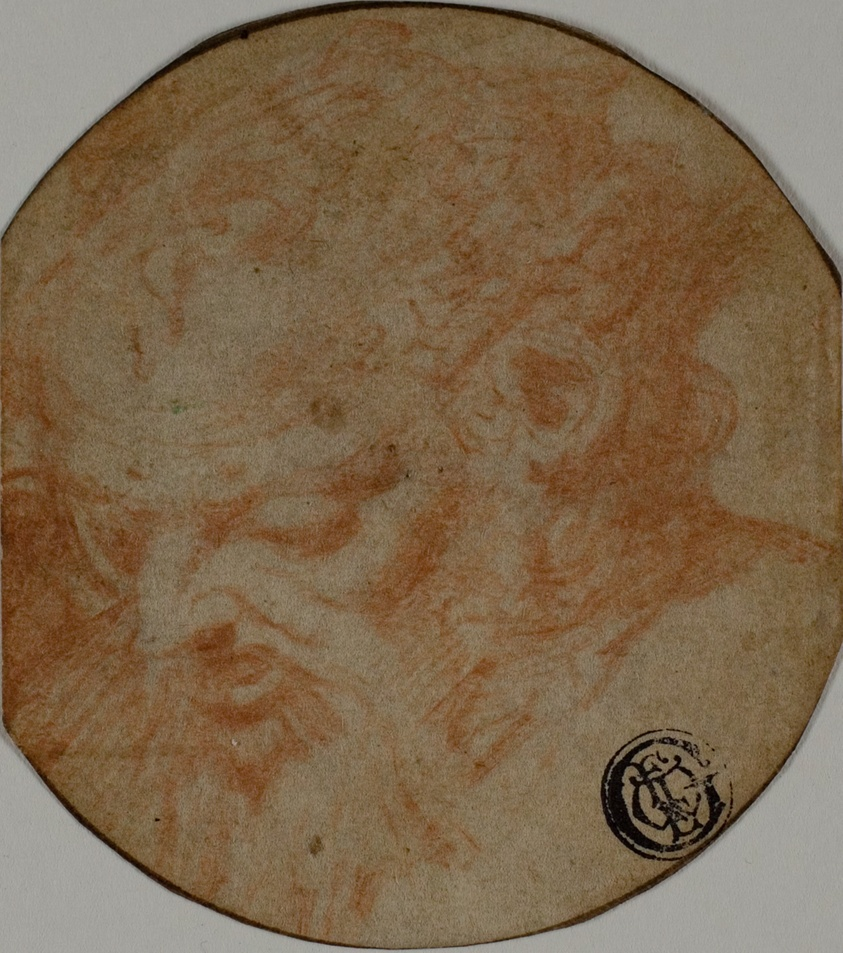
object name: Drawing and Watercolor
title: After the Antique (?): Head of a Satyr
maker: Unknown Artist; Italian, 1500-1599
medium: Red chalk on ivory laid paper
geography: Italy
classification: chalk; drawings (visual works); prints and drawing